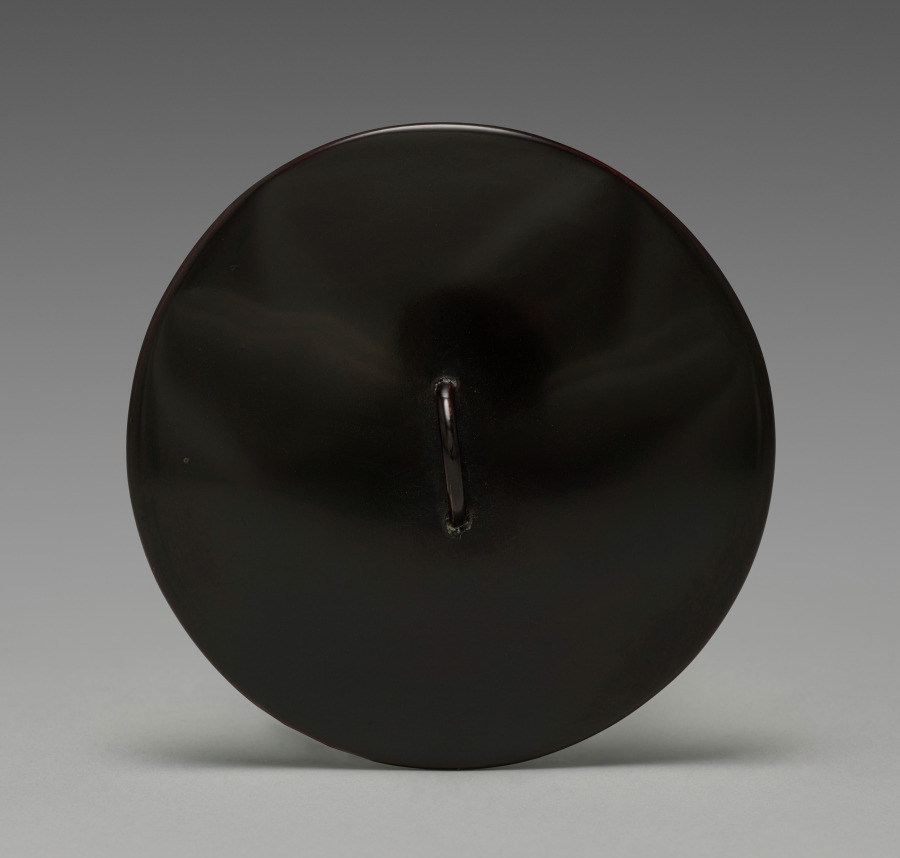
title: Lid for a Water Container with Peonies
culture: Japan, Meiji period (1868–1912)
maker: Seifū Yohei III (Japanese, 1851–1914)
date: 1900–1914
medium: Black lacquered wood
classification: Ceramic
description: This ceramic is an especially accomplished example of Yohei III’s combination of an all-over translucent colored glaze with molded and carved designs. It features the peony as its primary motif. The water container, or mizusashi, has a green glaze, and its design takes into consideration the rounded shape and the seated position of the host and guests. It begins low on the body with a flower just beginning to open and continues with another flower a bit higher up, with its petals fully extended and beginning to open outward. It finishes with a flower in full bloom, petals and leaves unfurled and spread outward from the center, now occupying almost the entire surface. The water container once belonged to the Hosokawa family, whose go-between corresponded with Yohei IV about the piece. Yohei IV thanked them for their payment and requested that despite his father’s death in the previous year, they continue to favor the studio with their orders. The letter and its envelope, as well as an auction tag, remain with the object.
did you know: Yohei IV wrote an inscription on the reverse of the inner box lid authenticating the work as one made by his father.